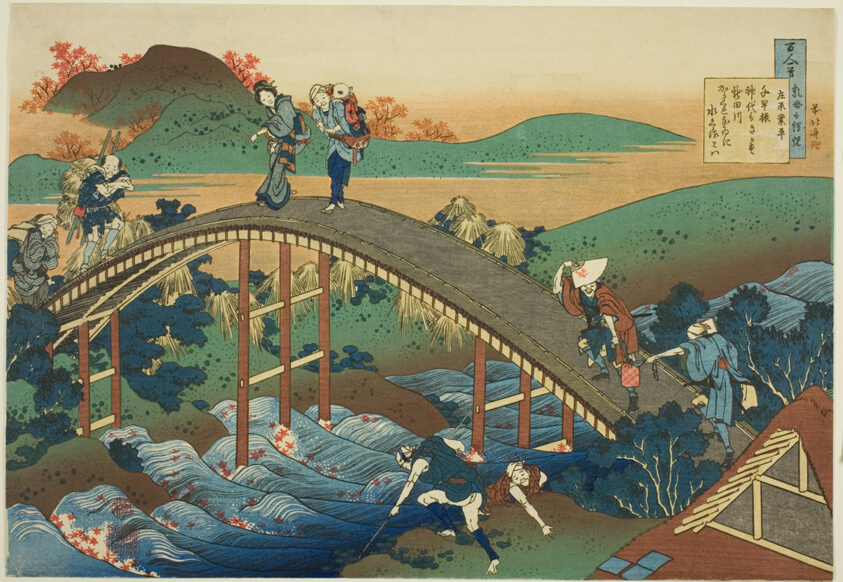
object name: Print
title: Ariwara no Narihirafrom the series One Hundred Poems Explained by the Nurse (Hyakunin isshu uba ga etoki)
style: Japanese (culture or style)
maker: Katsushika Hokusai 葛飾 北斎; Japanese, 1760-1849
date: 1835–36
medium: Color woodblock print, ōban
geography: Japan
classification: woodblock print; print; asian art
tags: landscapes